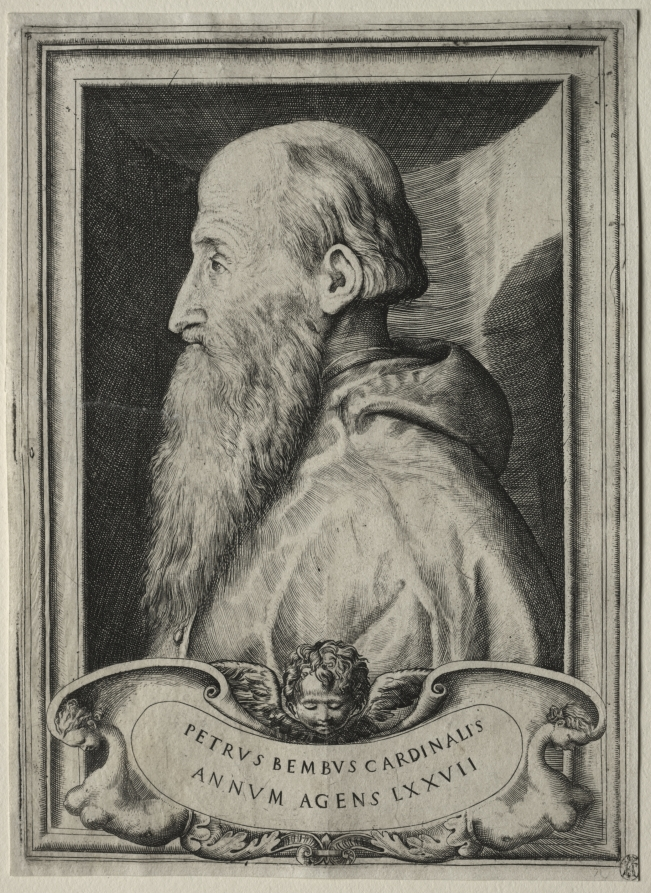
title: Portrait of Cardinal Pietro Bembo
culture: Italy, 16th century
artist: Giulio Bonasone (Italian, c. 1510–after 1576)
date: 1547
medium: etching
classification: Print